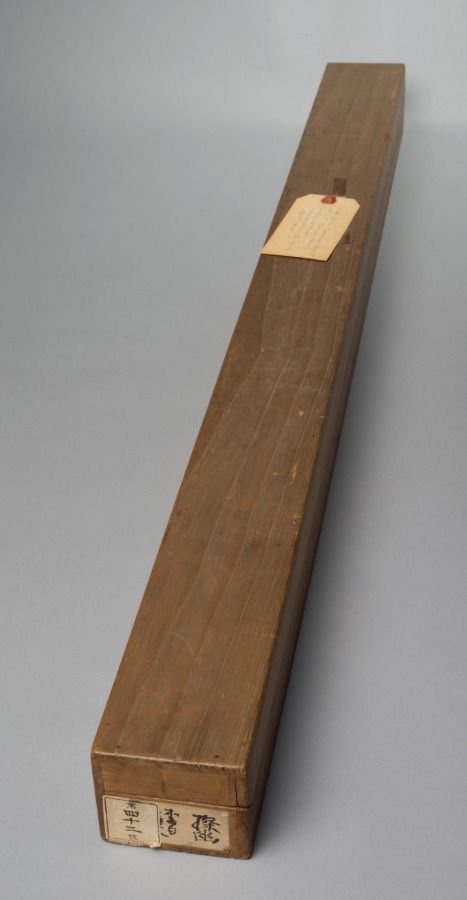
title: Chinese Sages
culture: Japan, Edo period (1615–1868)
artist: attributed to Kano Tan’yū (Japanese, 1602–1674)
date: mid- to late 1600s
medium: hanging scroll; ink and color on silk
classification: Painting